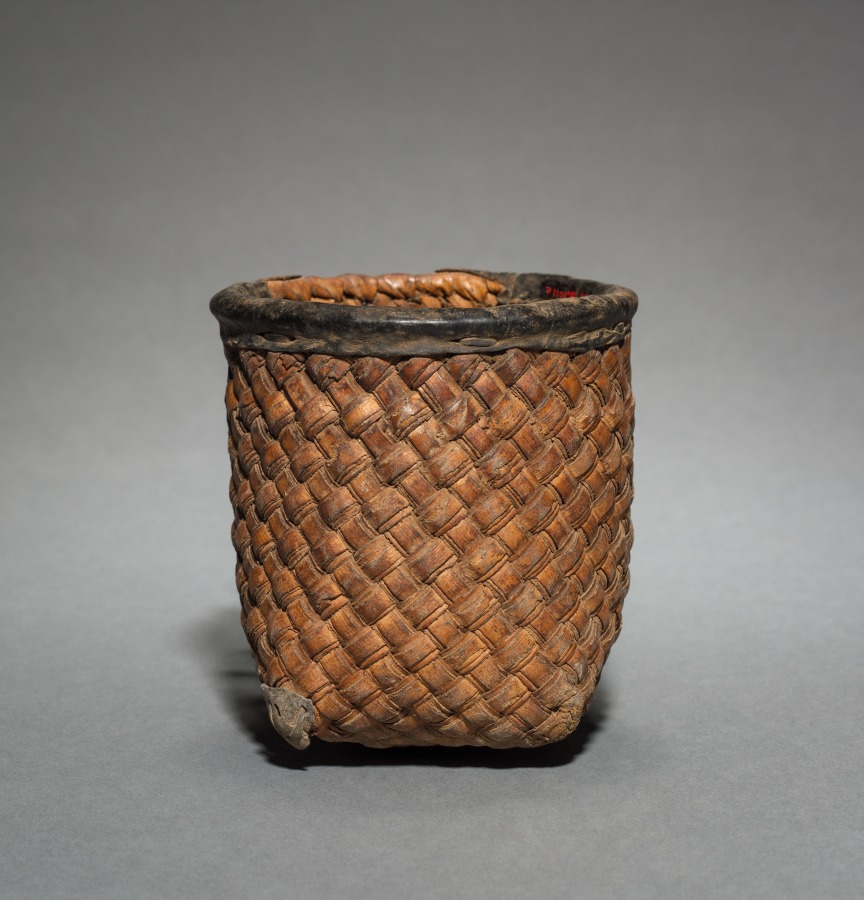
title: One of Ten Nesting Wedding Baskets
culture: Africa, Western Africa, Burkina Faso, Lobi–style maker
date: c 1900s ?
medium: Plant fiber and leather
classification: Vessels